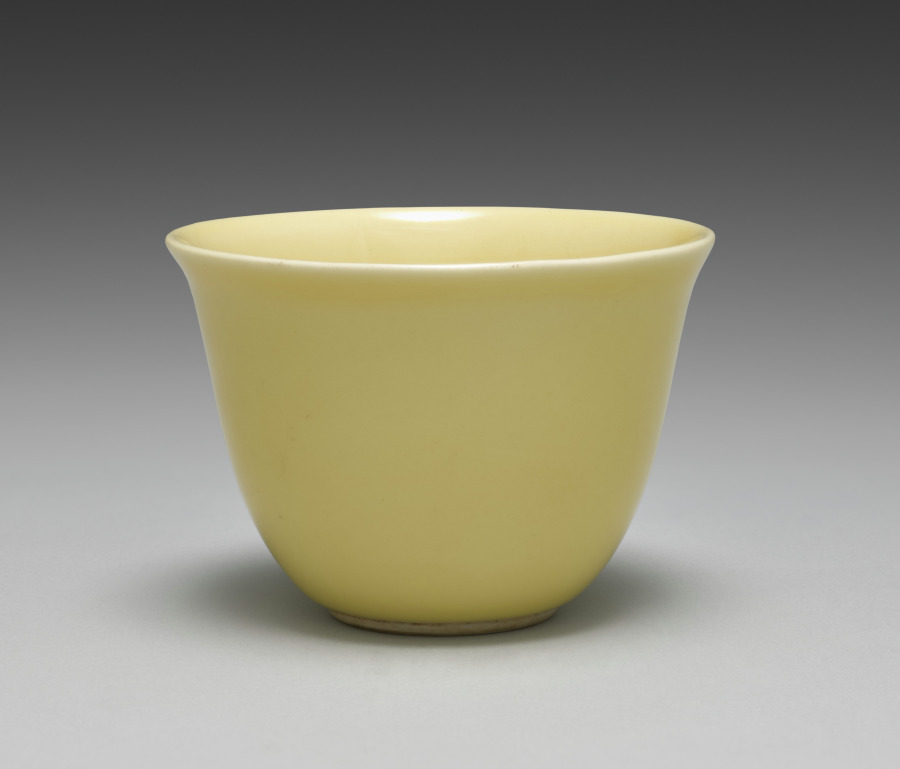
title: Cup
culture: Japan, Taishō period (1912–26) or Shōwa period (1926–89)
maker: Seifū Yohei IV (Japanese, 1872–1951)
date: 1914–46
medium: porcelain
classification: Ceramic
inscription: 清風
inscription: 清風造 【印】成山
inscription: 清風盧人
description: Like his father, Yohei IV also produced works with red or yellow monochrome glazes. His yellow-glazed works include this set of five drinking cups, a pair of sake pourers CMA 2022.216, and a sweets bowl molded into the shape of a chrysanthemum CMA 2022.218.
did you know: Seifū Yohei IV learned the ceramics industry from his father and painting from Tanomura Shosai.